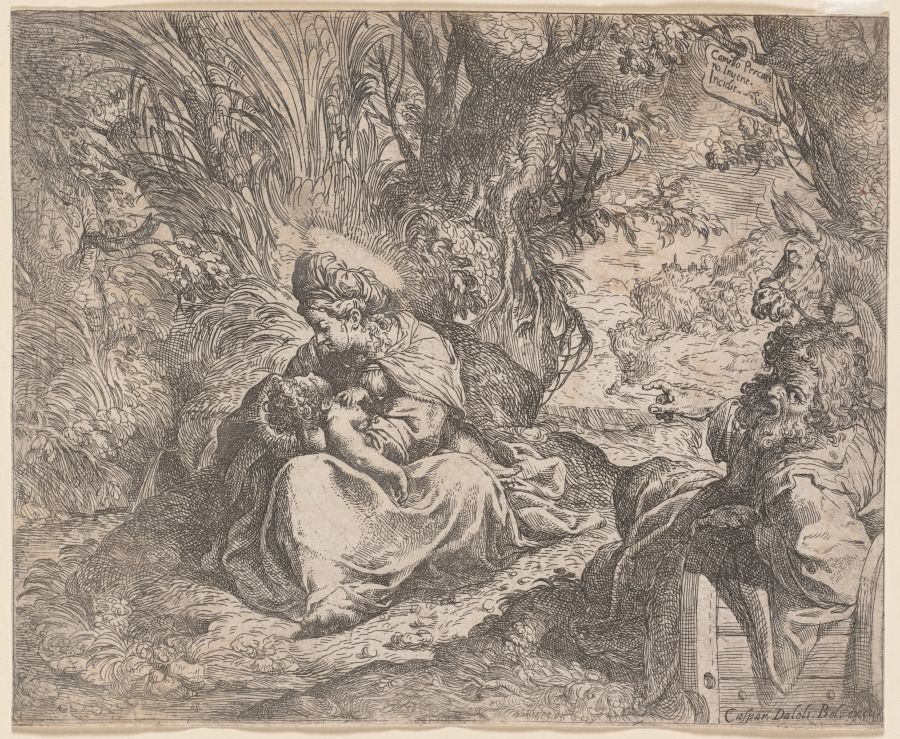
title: The Rest on the Flight into Egypt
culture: Italy, 16th century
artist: Camillo Procaccini (Italian, 1546–1629)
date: 1587–90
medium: etching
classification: Print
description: Camillo Procaccini used etching, a relatively new medium at the time, to create what were considered “printed drawings,” prints with the effect of spontaneous drawings, made with delicate and fluid lines on the etching plate. Here, he filled almost every inch of the composition with moving foliage, practically fusing nature with Mary, Joseph, and the Christ child, who have stopped on their flight from King Herod’s troops sent to kill Christ. Nature functions less as a container of symbols and more as a vibrant life force meant to evoke the viewer’s pious emotion.